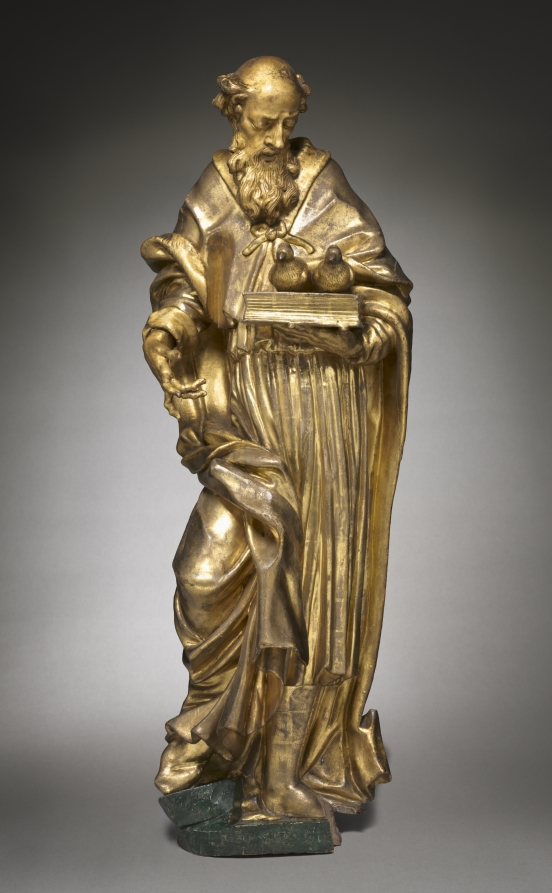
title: Saint Joachim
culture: Germany, 18th century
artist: Joseph Anton Feuchtmayer (German, 1696–1770)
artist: or Circle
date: c. 1760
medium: gilded wood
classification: Sculpture